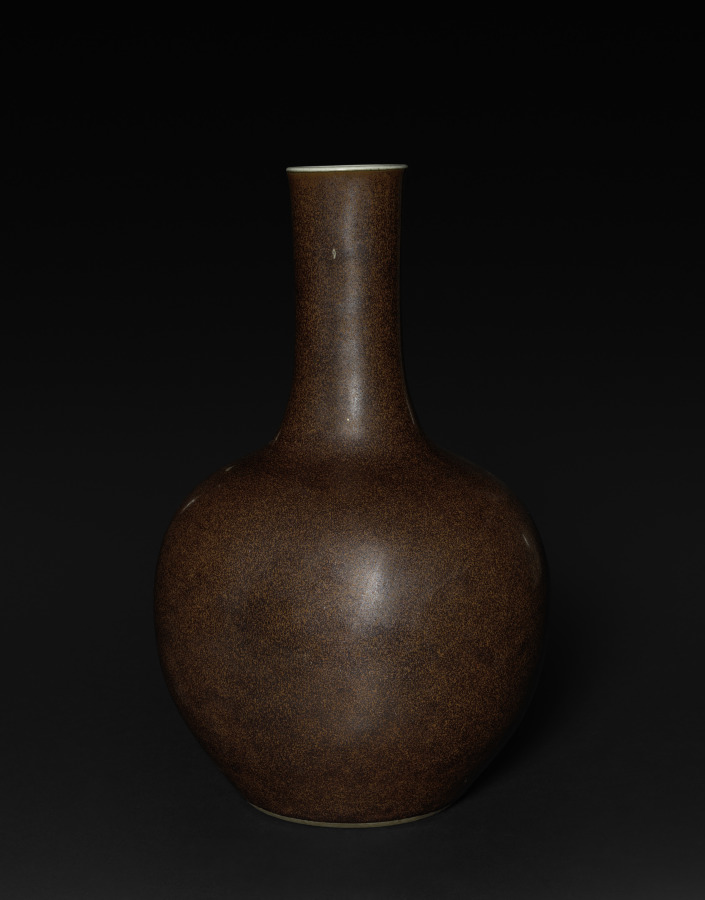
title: Vase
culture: China, Qing dynasty (1644–1911), Qianlong reign (1736–95)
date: 1736–95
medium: porcelain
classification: Ceramic